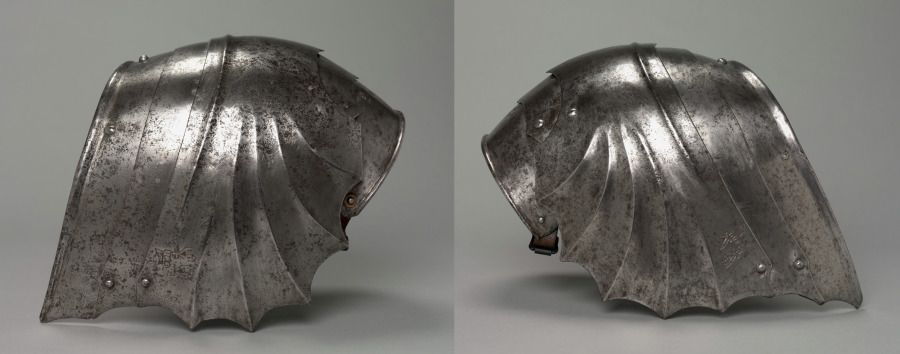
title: Pair of Gothic Fan-Shaped Pauldron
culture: Italy, Milan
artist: Antonio Missaglia (Italian, 1416/17–1495/96)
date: c. 1485–1500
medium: steel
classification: Arms and Armor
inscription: GAN, YA, YA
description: When the elements that made up a suit of armor had been forged, shaped, and polished, they were inspected for fit and finish. At this stage the master armorer would use a punch to stamp each element with his maker's mark. Other associated marks might include a town or guild mark, depending on the city of origin. The set of three marks shown here are of a type known to be Milanese. The upper mark seems to show three letters beneath a crown, while the mark below, twice repeated, is a split cross with the letters inside. These probably refer to the Missaglias.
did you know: A pauldron is a component of plate armor that covers the shoulder and often the armpit, and parts of the back and chest as well.